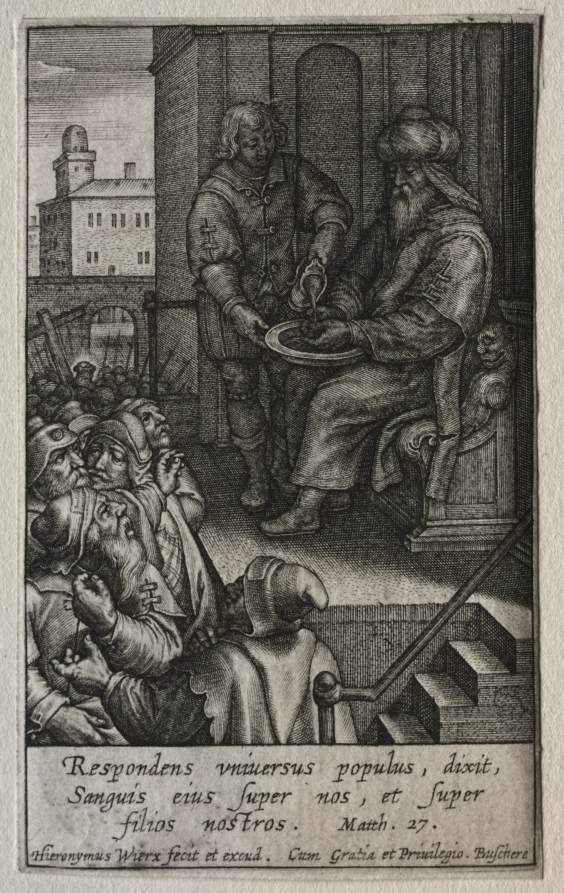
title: The Passion: Pilate Washing his Hands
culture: Flanders, late 16th-early 17th century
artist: Hieronymus Wierix (Flemish, 1553–1619)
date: before 1619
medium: engraving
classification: Print